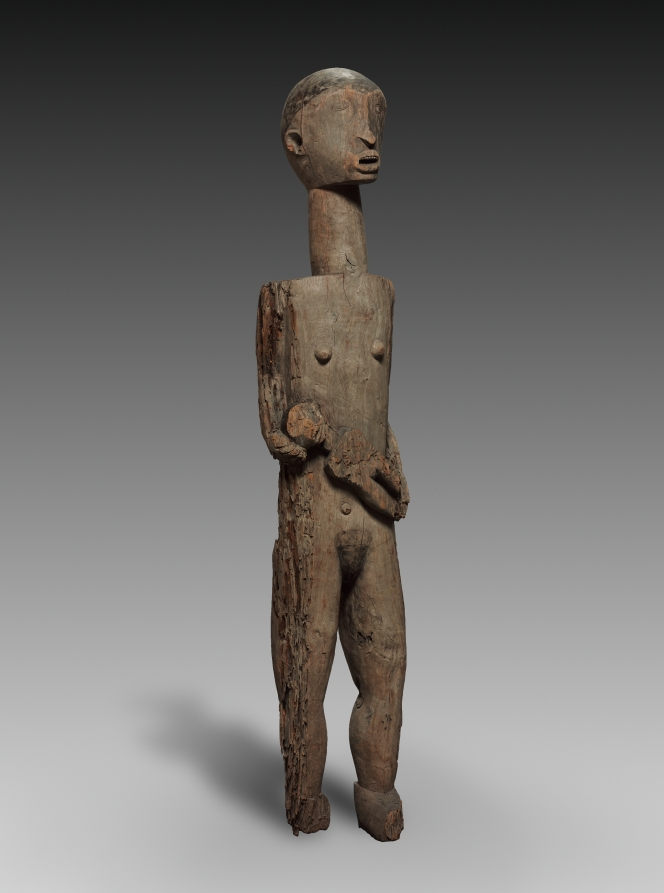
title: Figure of a Pair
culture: Africa, Central Africa, Democratic Republic of the Congo or Central African Republic (most likely), possibly Monzombo-style maker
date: late 1800s–early 1900s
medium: Wood and iron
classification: Sculpture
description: The Ubangi region's history of successive migrations and assimilations has resulted in numerous exchanges of religious beliefs and ritual practices. Despite some stylistic traits, including the heart-shaped faces and the male's crested coiffure, this figure with its female pair is unlike any other in the Ubangian corpus. Based on indirect evidence, the pair is said to represent the culture's primordial couple.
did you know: There are no other carved mother-child figures that originate from the Monzombo ethnic group.